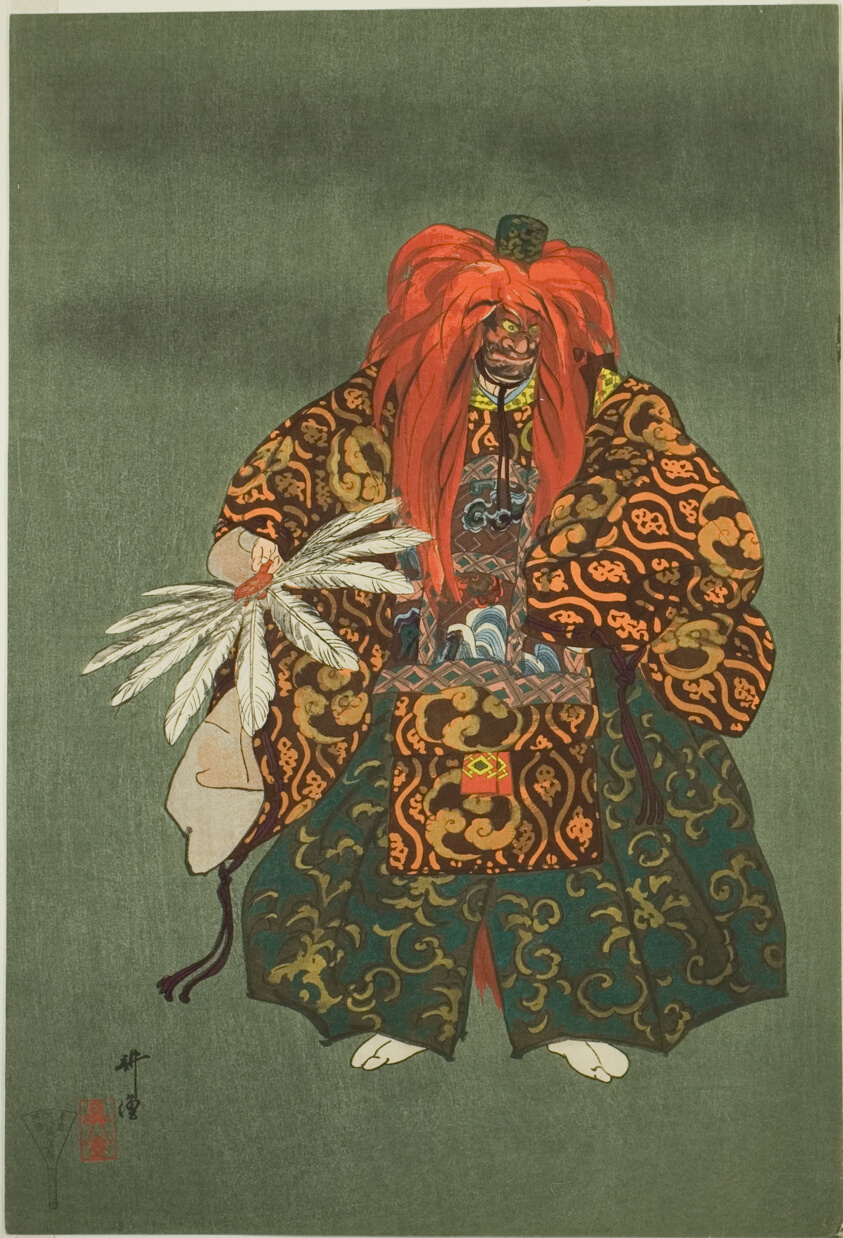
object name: Print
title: Kurama Tengu, from the series "One Hundred No Dramas (Nogaku hyakuban)"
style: Japanese (culture or style)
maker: Tsukioka Kogyo; Japanese, 1869-1927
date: 1898/1903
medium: Color woodblock print; left sheet of oban diptych (right: 1943.833.49b)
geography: Japan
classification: woodblock print; print; asian art